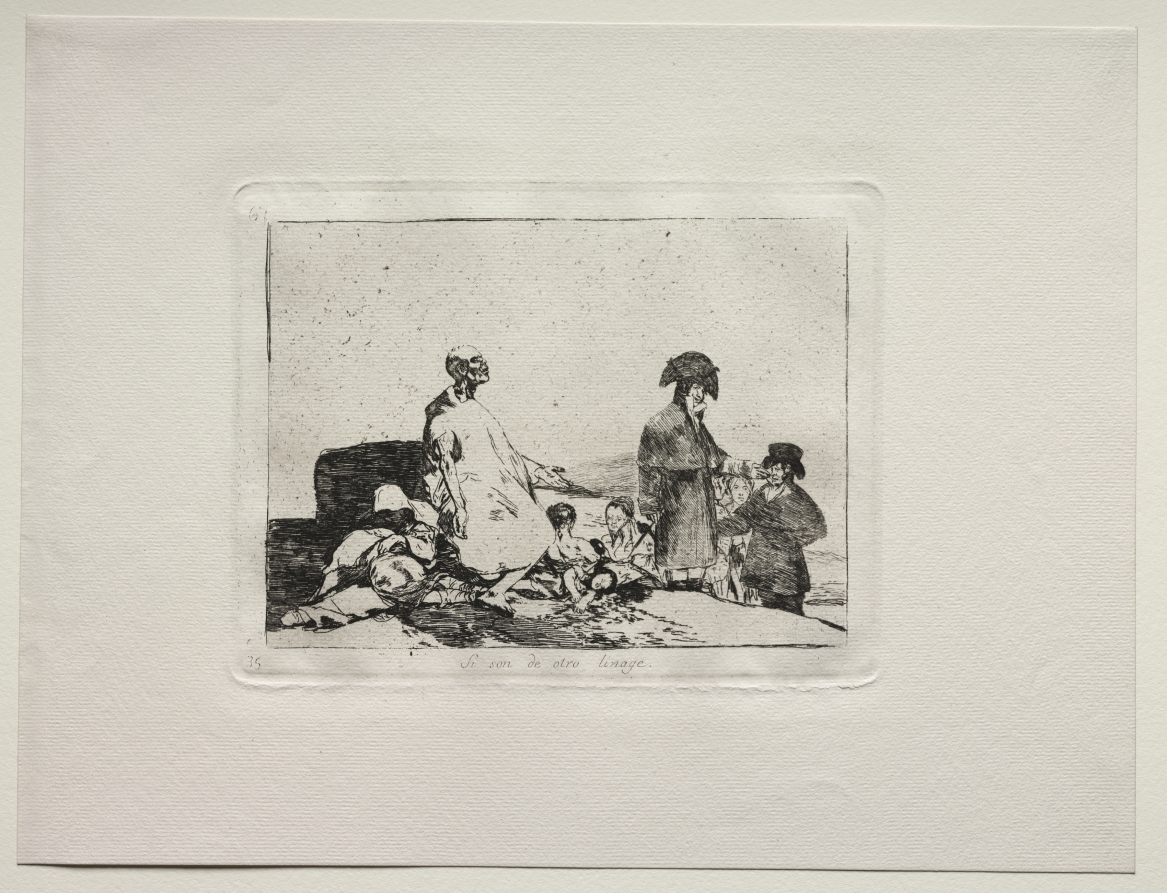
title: The Horrors of War: Perhaps They are of Another Breed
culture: Spain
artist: Francisco de Goya (Spanish, 1746–1828)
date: c. 1810–20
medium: etching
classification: Print